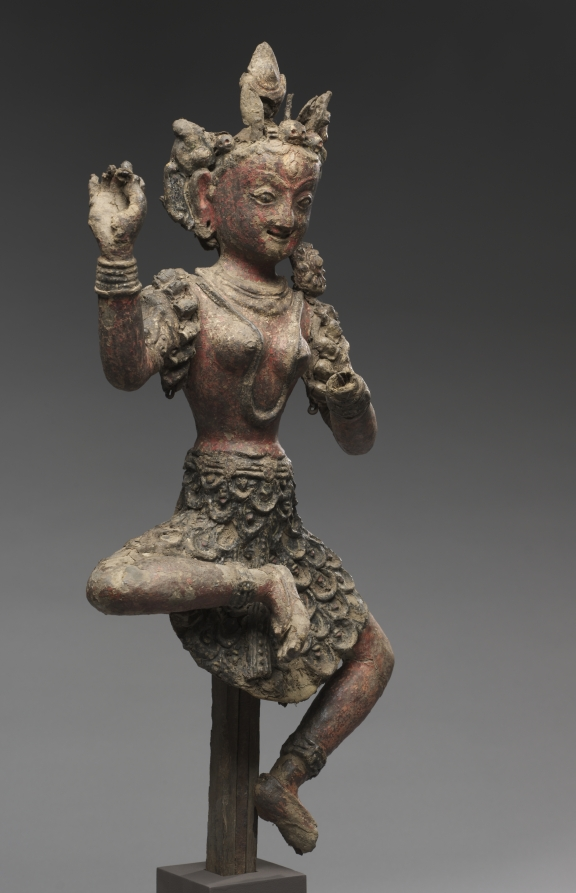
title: Goddess Vajravarahi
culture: Nepal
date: c. 1040–c. 1310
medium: unbaked clay and pigment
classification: Sculpture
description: This powerful red goddess dances vigorously and raises one hand that would have held a flaying knife, while the other once held a skull cup. Her bone skirt and garland of freshly severed heads complement the skulls that adorn her crown. Her eyes bulge, her brow furrows, and she bares her teeth. These attributes communicate her power to assist her followers in overcoming passions, ignorance, and fear. This is one of the earliest surviving images made of unbaked clay, using an iron armature and rope strings to support the ornament.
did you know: The wooden post is an original and would have been set into a sculpted corpse.